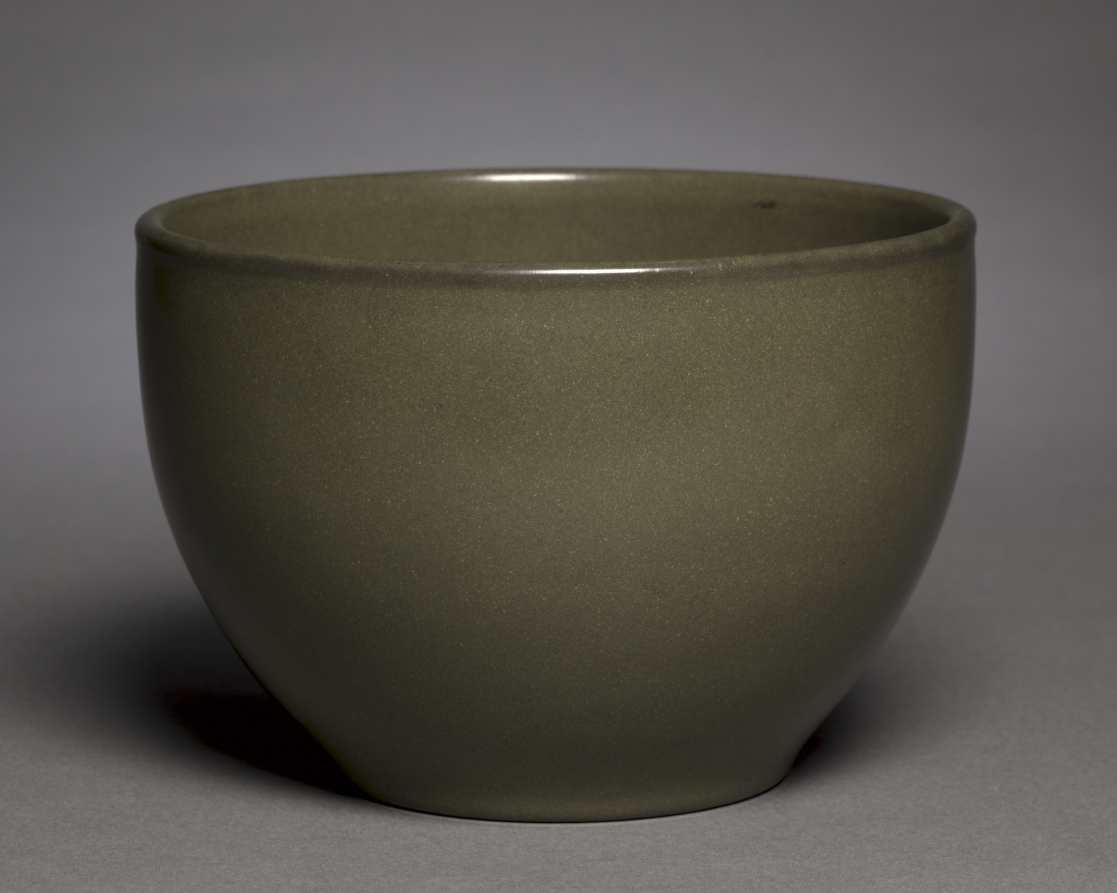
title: Bowl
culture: China, Qing dynasty (1644-1911), Qianlong mark and reign (1736-1795)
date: 1736–95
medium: porcelain with "tea-dust" glaze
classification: Ceramic